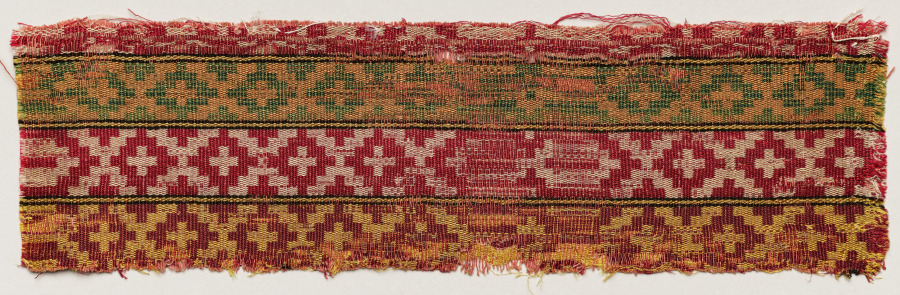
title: Fragment of a furnishing textile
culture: Africa, North Africa, Morocco, Moroccan weaver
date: 1800s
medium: Silk, dye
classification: Textile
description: This textile is made of woven silk, with a pattern of repeating crosses alternating in different color combinations. The fragment was likely once part of a furnishing textile, perhaps used to cover a pillow or other household object.